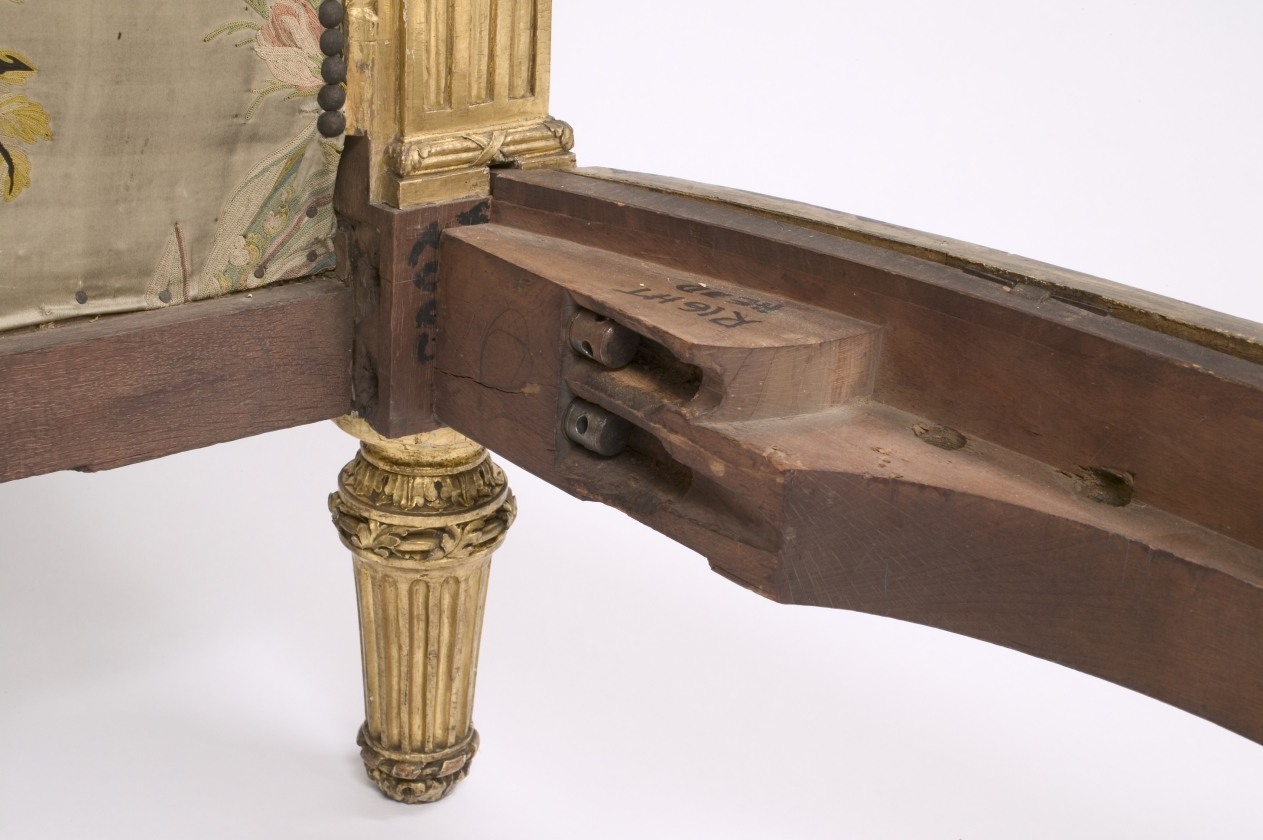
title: Bed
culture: France, 18th century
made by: attributed to Georges Jacob (French, 1739–1814)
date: 1700s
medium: gilded wood and embroidered satin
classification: Furniture and woodwork